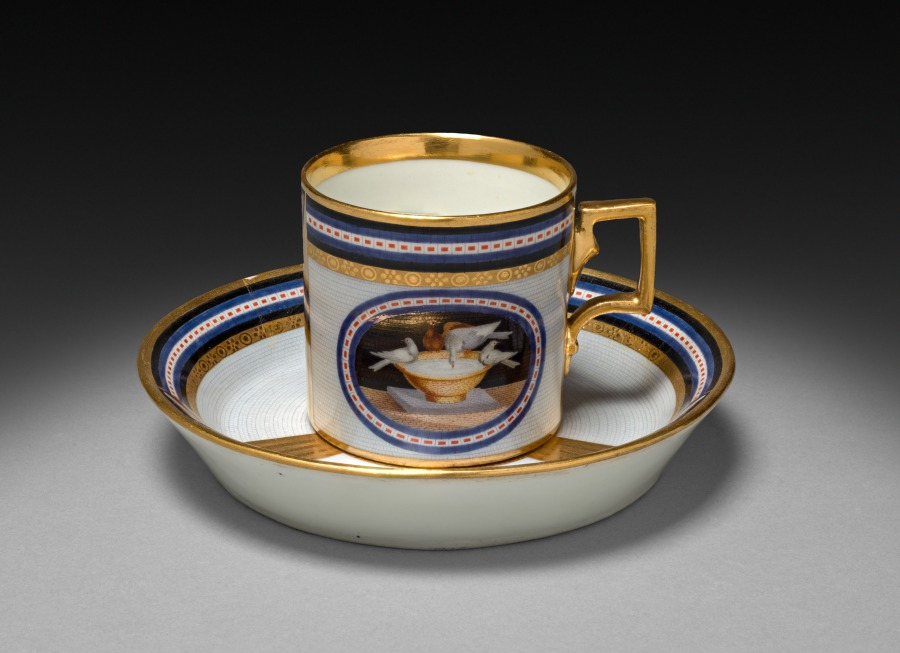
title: Cup and Saucer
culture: Austria, Vienna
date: c. 1800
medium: porcelain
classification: Ceramic